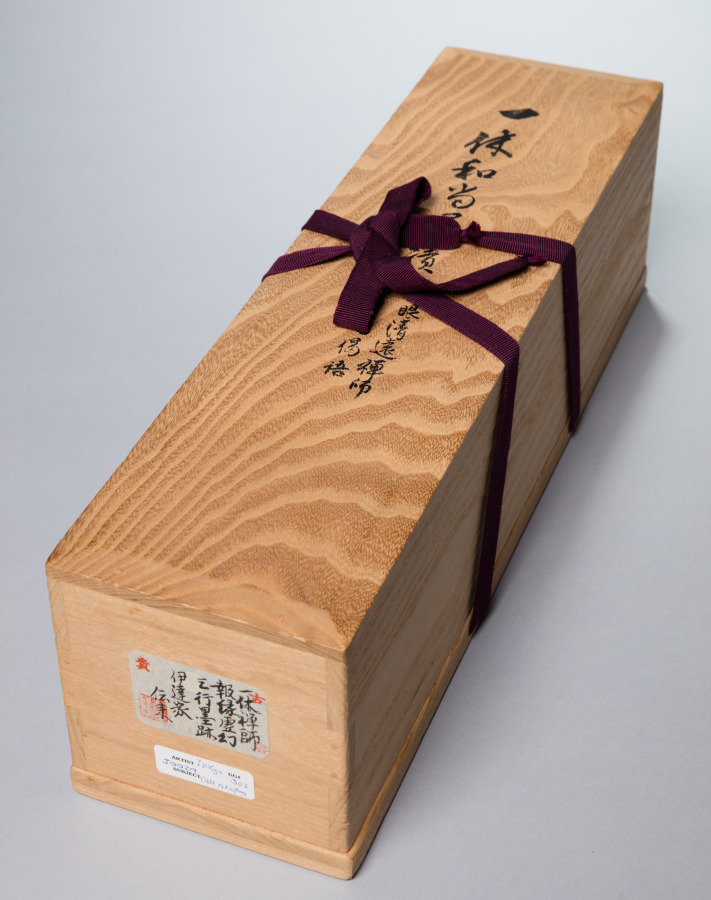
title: Reflections of Priest Foyen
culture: Japan, Muromachi period (1392–1573)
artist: Ikkyū Sōjun (Japanese, 1394–1481)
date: 1400s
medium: hanging scroll, ink on paper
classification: Painting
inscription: signed: "Kido nanasei son, Ikkyūshi Sōjun sho (Written by Ikkyū Sōjun, the seventh generation of Kido)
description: Left by his mother at a small Zen temple in Kyoto at the age of six, Ikkyu later drew on his early studies and experiences for his writings, which focused on his keen interest in the Chinese classics. Poetry in particular was a favorite subject and images from classical poetry or passages from favorite poems or commentaries frequently provided Ikkyu with the core ideas for his own work. A rare example of his calligraphy, this narrow scroll contains a verse in eight phrases, each comprising four characters. The whole verse is organized in three towering lines of brusque, emphatic calligraphy augmented by Ikkyu's signature-the two lines of running script in the lower left corner. The text refers to a passage included in the Chronicle of the Zen Sect that contains a cautionary reminder attributed to the legendary Chinese monk Foyen Qingyuan (1067-1120), long revered in Japan. The initial phrase begins: "Life is a mirage."